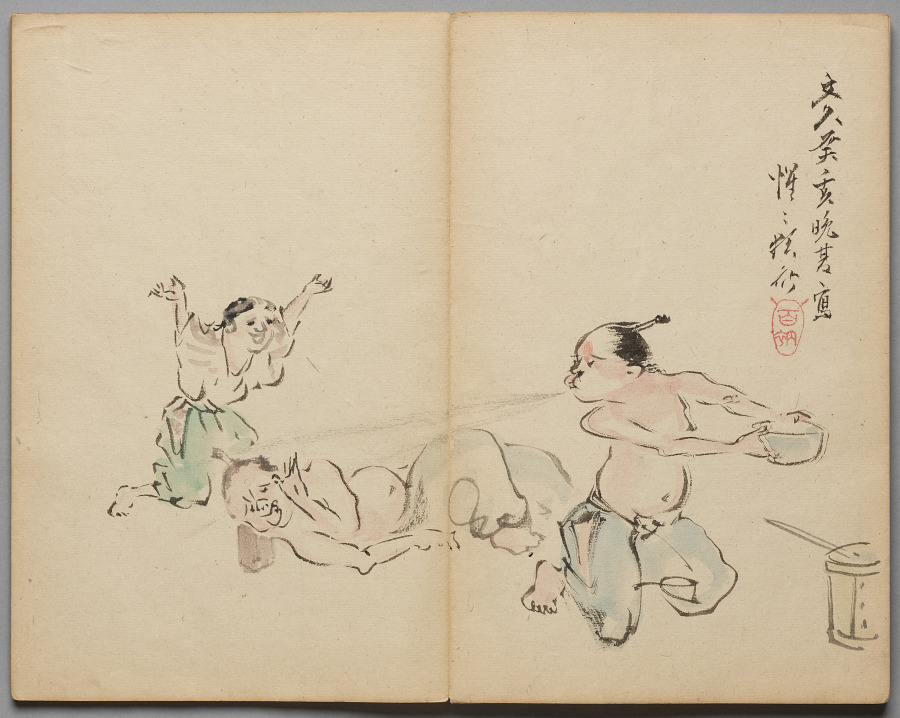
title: Cool Spray at Naptime from Sketch Album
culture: Japan, Edo period (1615–1868) to Meiji period (1868–1912)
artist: Kawanabe Kyōsai (Japanese, 1831–1889)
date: mid- to late 1800s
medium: Accordion-style book of 26 double-leaves; ink and color on paper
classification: Bound Volume